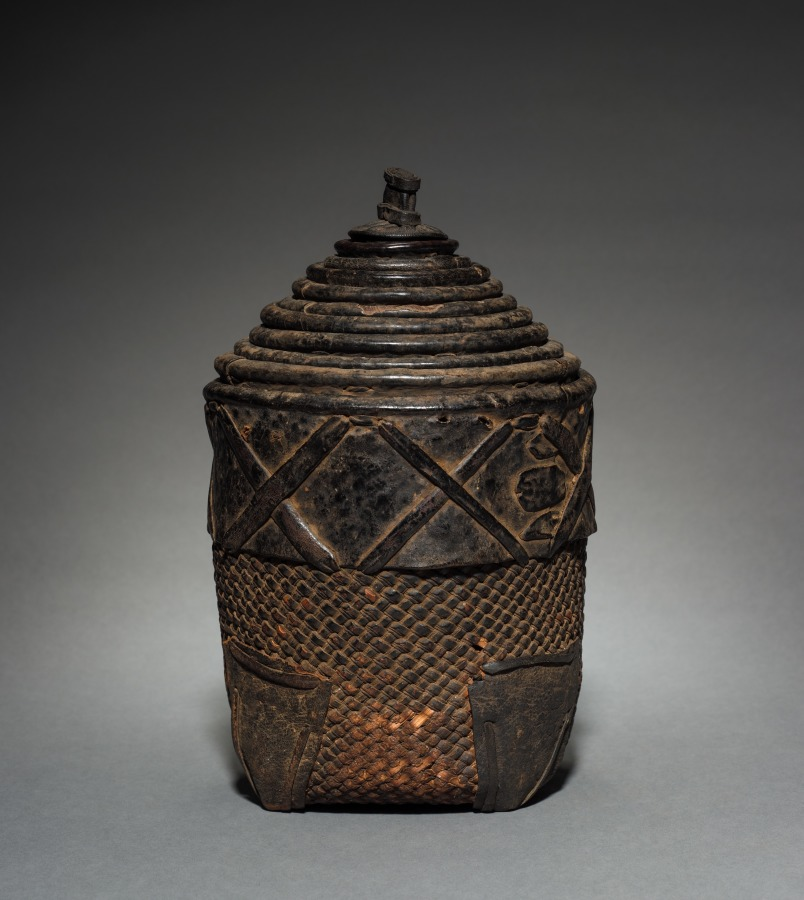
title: Set of Nesting Wedding Baskets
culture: Africa, Western Sudan, Burkina Faso, Lobi, 20th century (?)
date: c. 1900s ?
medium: Plant fiber and leather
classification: Vessels